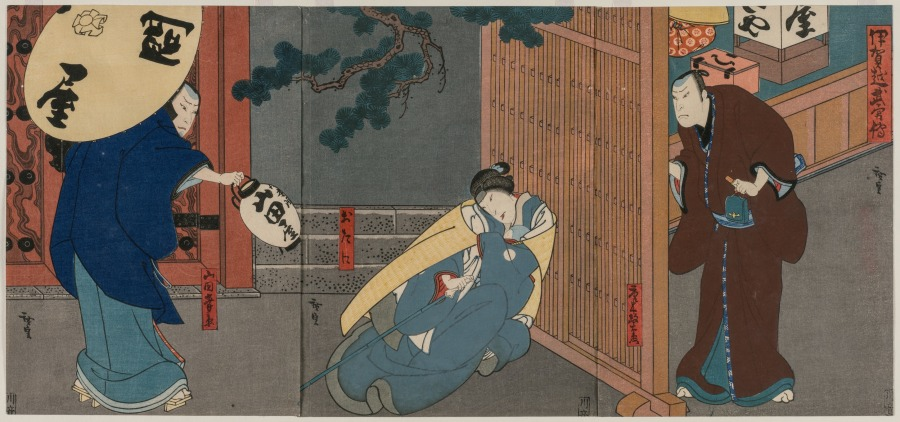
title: A Tale of Valor at Iga Pass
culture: Japan, Edo period (1615–1868)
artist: Gosōtei Hirosada (Japanese)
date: c. 1850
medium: color woodblock print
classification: Print